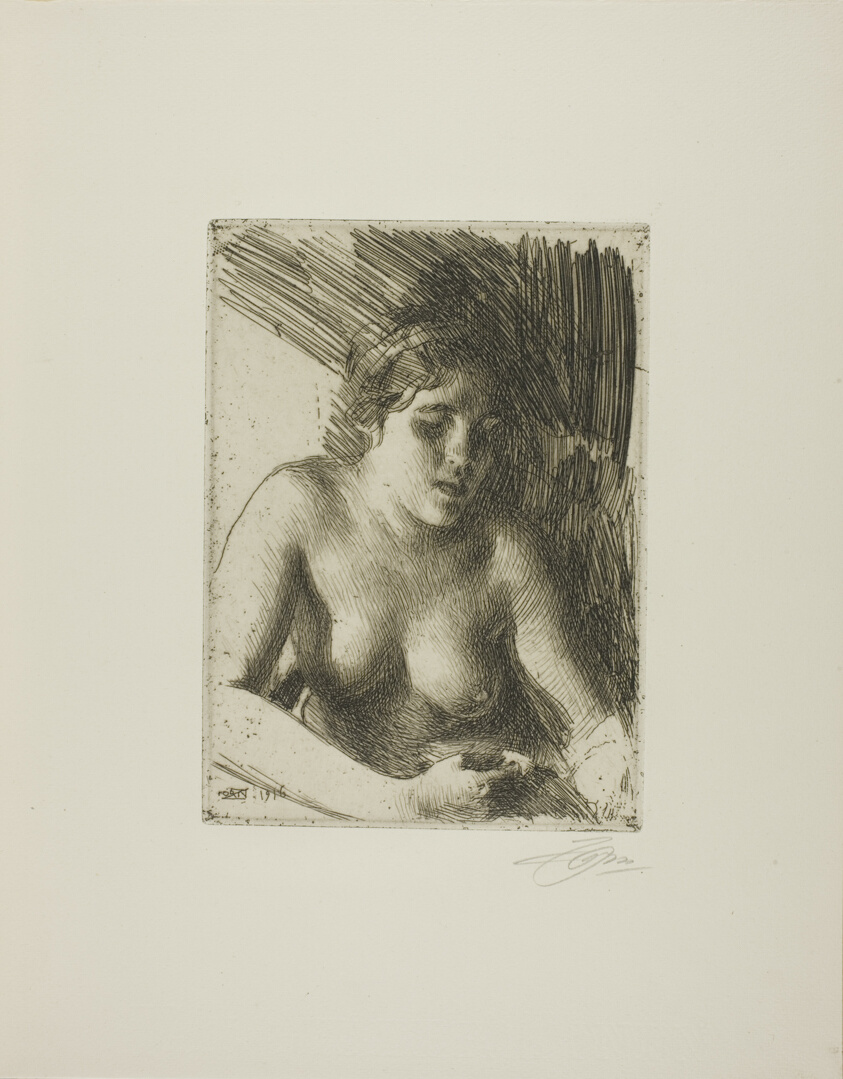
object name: Print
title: Bust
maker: Anders Zorn (Swedish, 1860-1920)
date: 1916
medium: Etching on ivory laid paper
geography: Sweden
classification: etching; print; prints and drawing